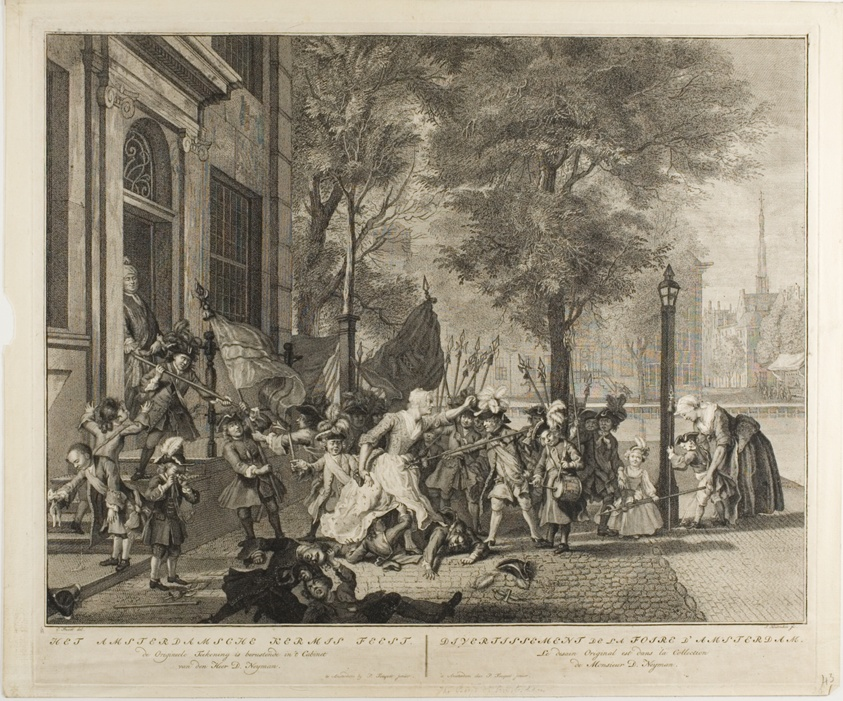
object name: Print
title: The Boys of Amsterdam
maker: Jacobus Houbraken (Dutch, 1698-1780); after Cornelis Troost (Dutch, 1679-1740)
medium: Engraving on ivory laid paper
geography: Holland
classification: engraving; print; prints and drawing